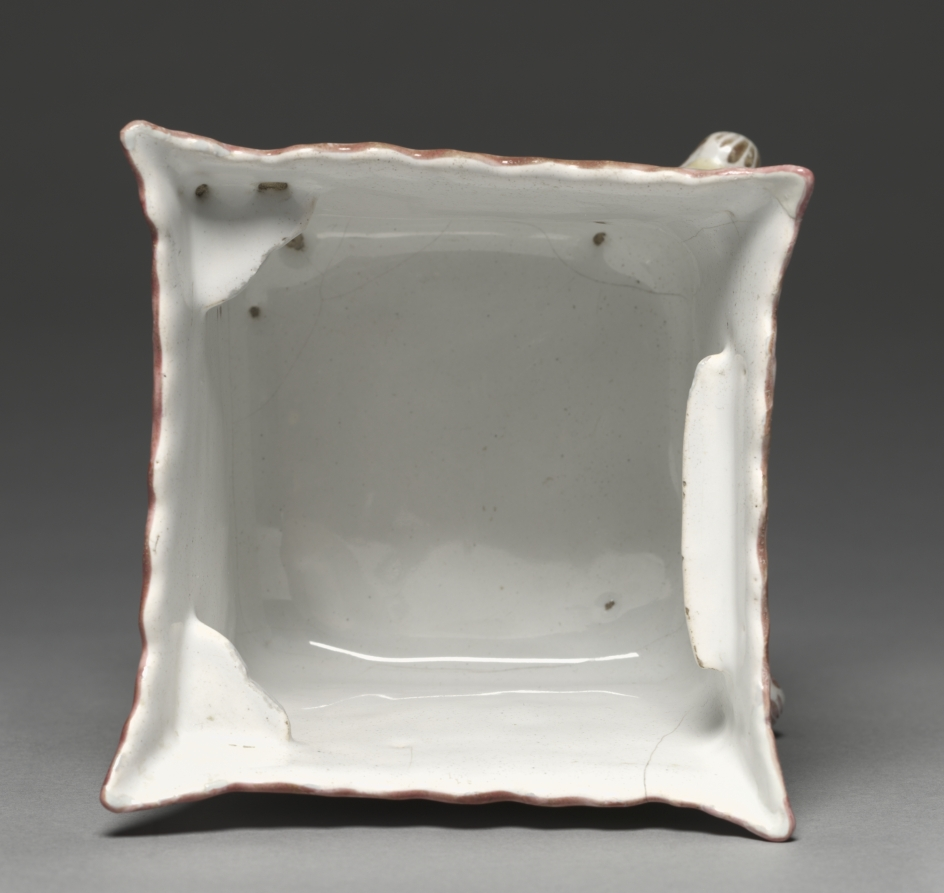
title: Flower Container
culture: France, 18th century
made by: Sceaux Factory (French, active 1748–66)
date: c. 1765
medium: faience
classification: Ceramic